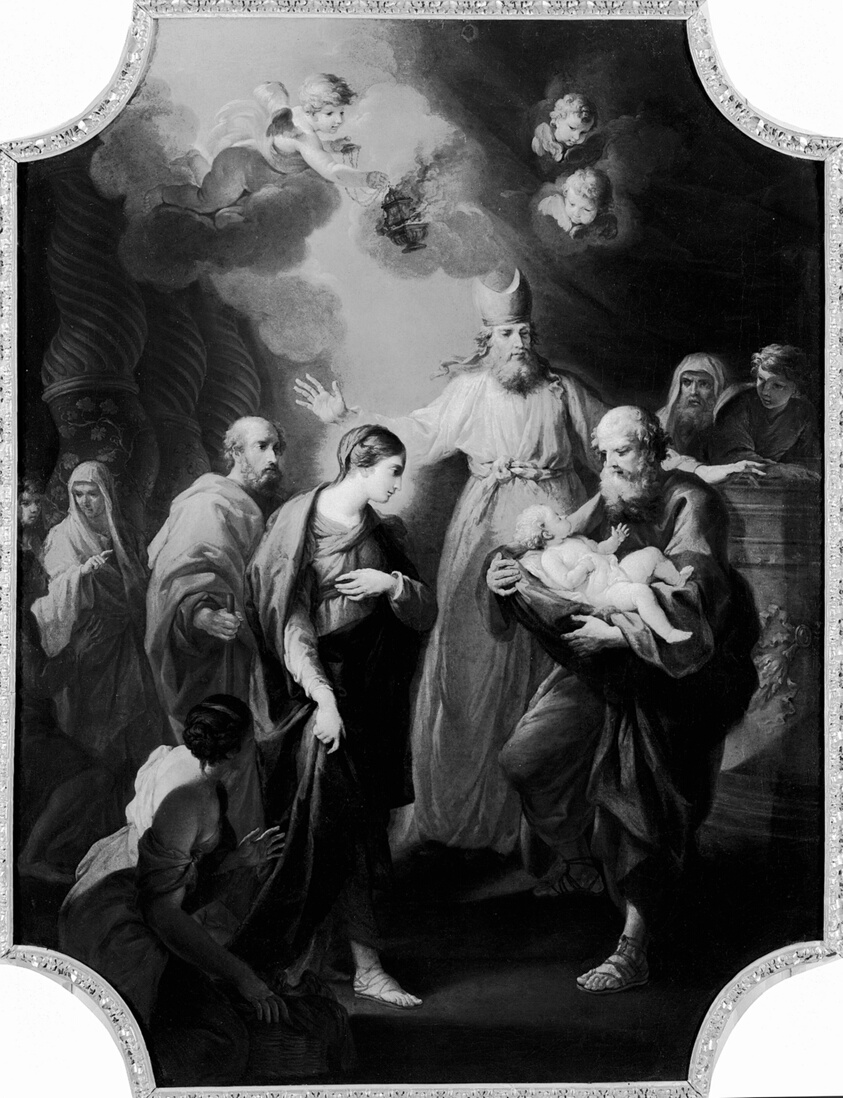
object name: Painting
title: The Presentation in the Temple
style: 18th Century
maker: Stefano Pozzi (Italian, 1699–1768)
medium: Oil on canvas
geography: Italy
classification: painting; paint; oil paintings (visual works); oil on canvas; Italian; european painting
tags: Christian subjects, holy family, Jesus, Virgin and child/Madonna and child, Virgin Mary, religion, religious, religious scenes, religious figures, Christianity, cherubs, angels, clouds, women, men, temple, babies, woman with children, mother, fathers, sons